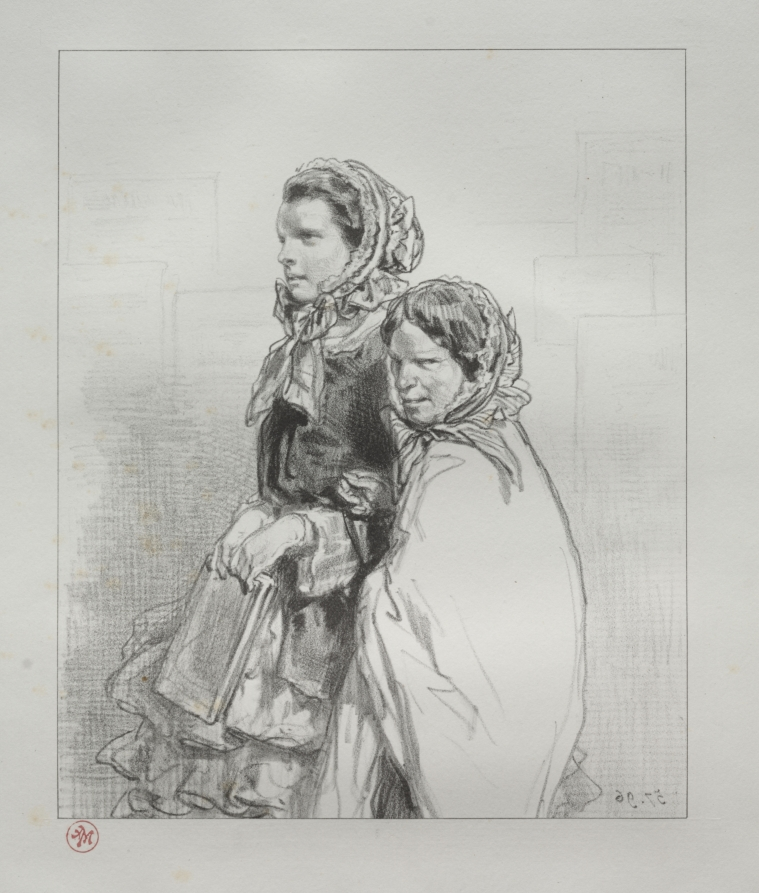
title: Par-ci, par-lá: My Daughter has sung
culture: France, 19th century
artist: Paul Gavarni (French, 1804–1866)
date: 1854–1856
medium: lithograph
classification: Print